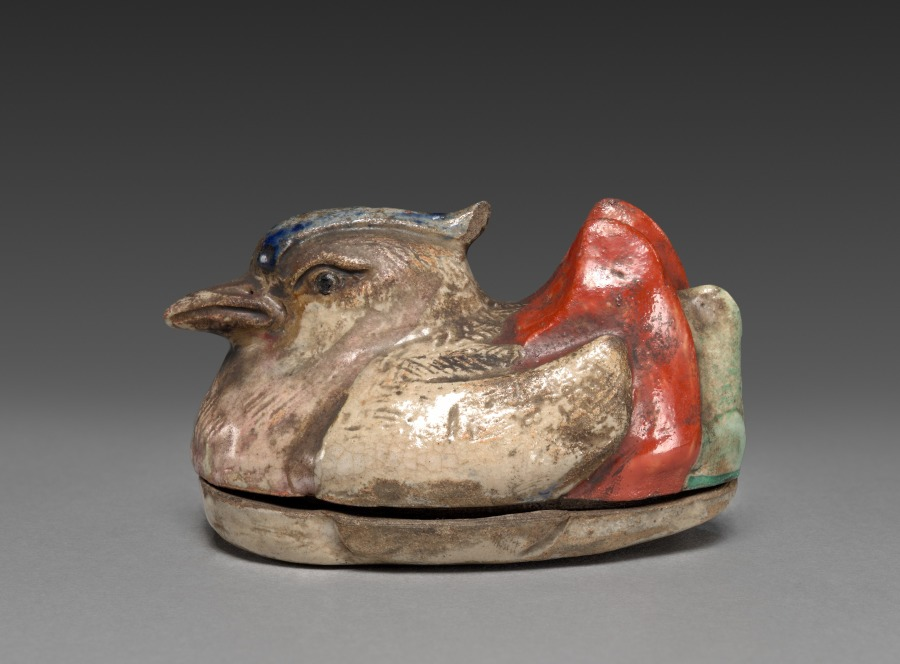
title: Incense Container (Kōgō) in the Shape of a Mandarin Duck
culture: Japan, Edo period (1615–1868)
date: c. 1700–1868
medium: Stoneware with glaze and incised decoration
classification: Ceramic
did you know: The artist incised the bird's feet on the bottom of the box.